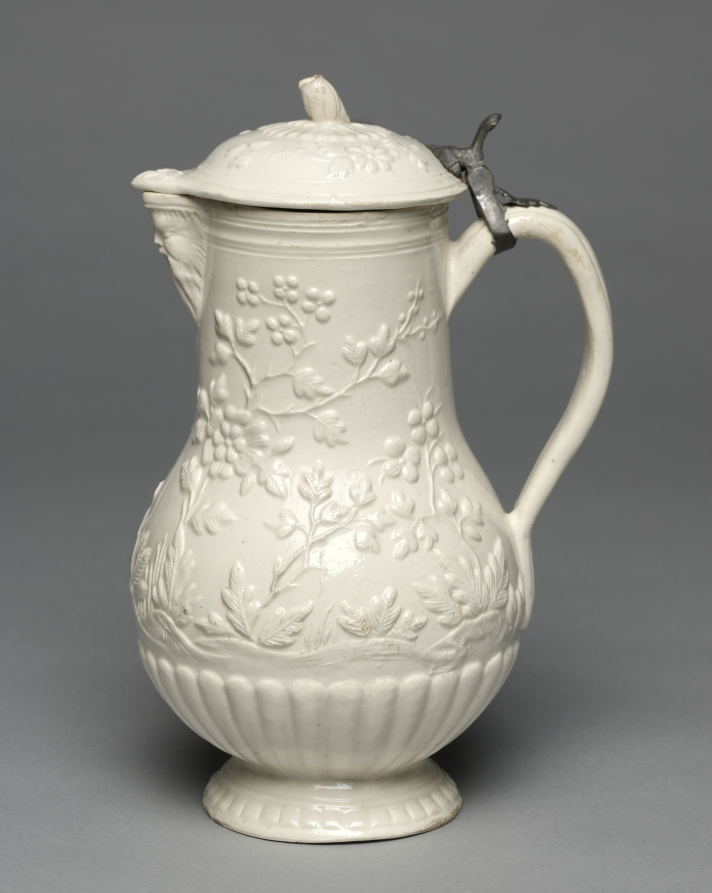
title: Covered Milk Jug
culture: France, Paris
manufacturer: Pont-aux-Choux Factory (French)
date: c. 1770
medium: Lead- glazed earthenware (faience fine); pewter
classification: Ceramic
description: Cream-colored earthenware was introduced by Wedgwood in the 1760s. He exported it to the continent, where it was quickly imitated. In France the ware was known as faience fine and the Pont-aux-Choux factory in Paris was the most famous manufacturer of such wares. Cream ware was harder and thus more durable than traditional faience.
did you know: Milk jugs with lids or covers usually held warm milk for coffee or tea.